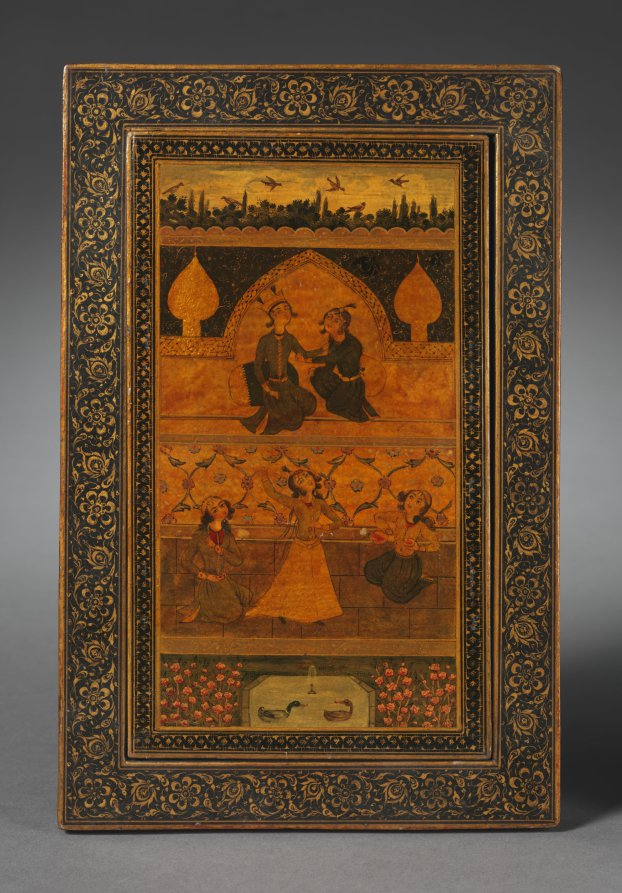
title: Mirror Case with Lid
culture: Iran, Qajar period (1779-1925)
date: 1800s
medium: Varnished lacquer and opaque watercolor over papier-mâché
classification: Lacquer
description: Love and war are the themes of the paintings on the inside and outside of this mirror case. The inside surface of the lid is painted with a royal couple seated, touching each other, within a walled garden. In front of them a female dancer performs and another pours a cup of wine. Military scenes are painted on the exterior sides; on the underside of the case enemies flee, heads roll, and a corpse lies before the victorious king and his armies.